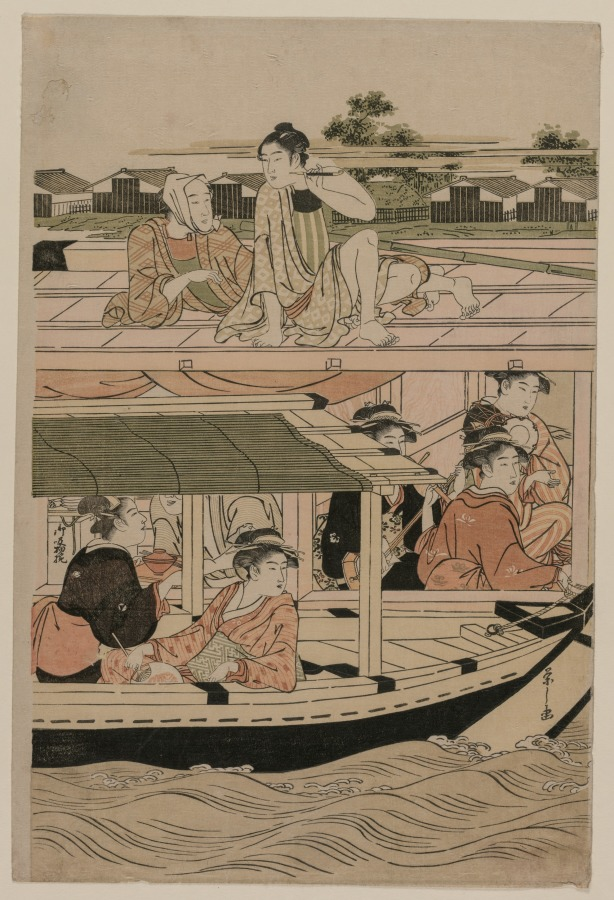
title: Print from Pleasure Boats on the Sumida River beneath Shin-Ōhashi Bridge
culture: Japan, Edo period (1615–1868)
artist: Chōbunsai Eishi (Japanese, 1756–1829)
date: c. 1792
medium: wooblock print from a pentaptych; ink and color on paper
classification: Print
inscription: Signature: Eishi ga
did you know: This print is the second from the left of a composition comprising five prints, but the museum has only two of them.